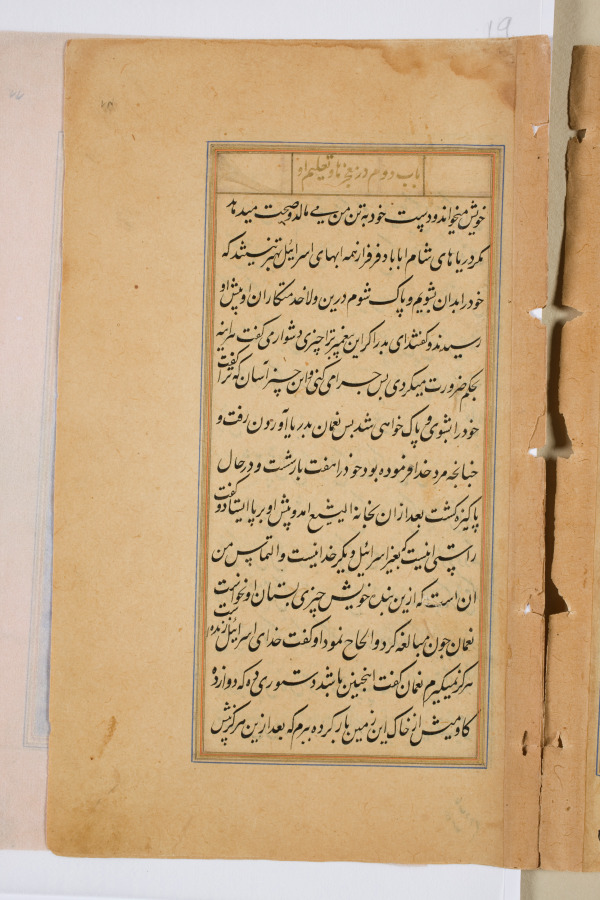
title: Text page from a Mirror of Holiness (Mir’at al-quds) of Father Jerome Xavier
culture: Mughal India, Allahabad, made for Prince Salim (1569–1627)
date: 1602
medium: Ink and gold on paper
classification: Manuscript